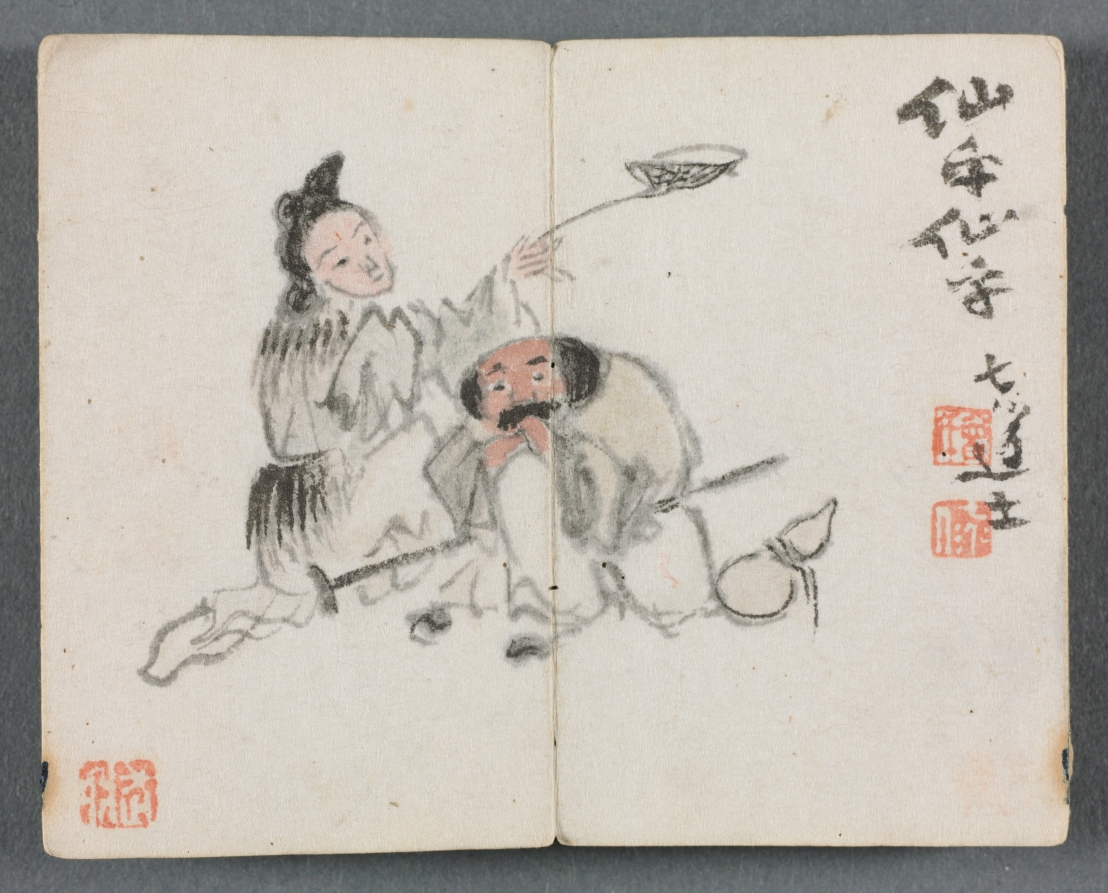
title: Miniature Album with Figures and Landscape (Man and Woman)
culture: China, Qing dynasty (1644–1911), Qianlong reign (1736–95)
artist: Zeng Yandong (Chinese, c. 1751–1827)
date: 1822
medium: album leaf, ink and color on paper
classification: Painting